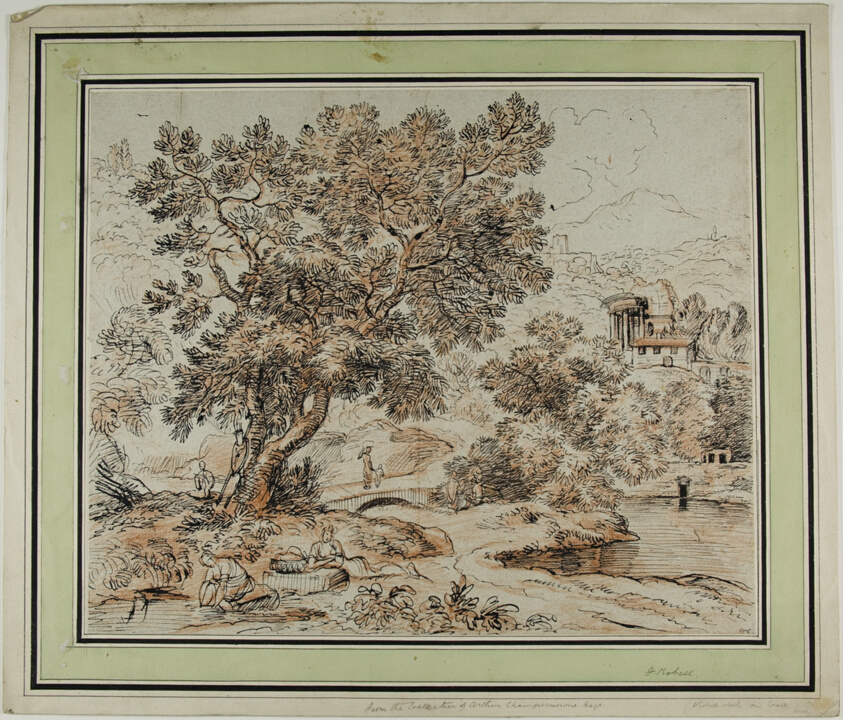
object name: Drawing and Watercolor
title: Figures in Idyllic Italianate Landscape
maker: Attributed to Franz Kobell; German, 1749-1822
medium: Pen and black ink, over red chalk, on blue laid paper, laid down on card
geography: Germany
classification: pen and ink drawings; drawings (visual works); prints and drawing